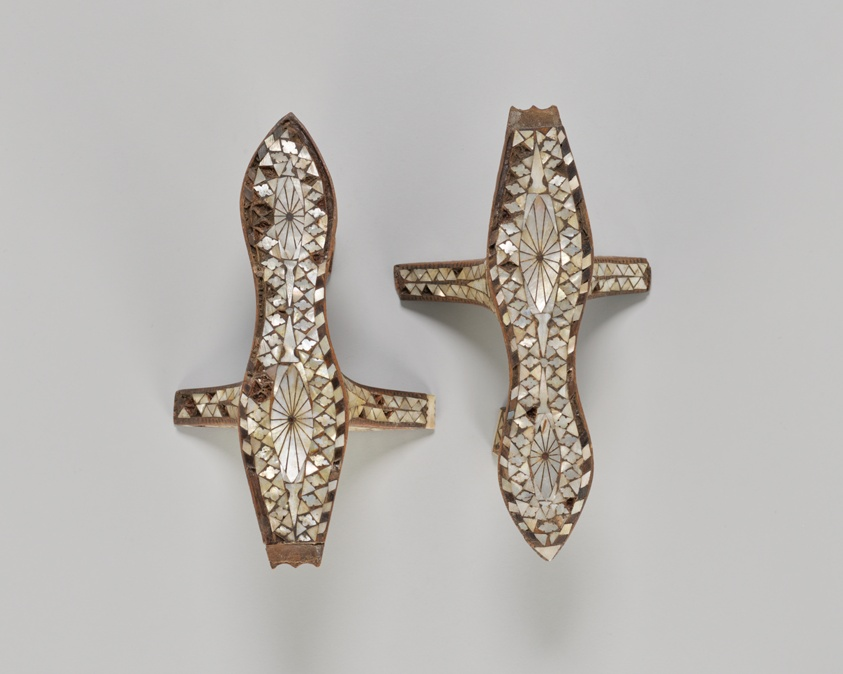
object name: Textile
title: Pair of Clogs (Qabqab)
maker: Algeria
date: Mid–19th century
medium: Wood inlaid with mother of pearl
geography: Algeria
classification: textile; costume accessory - shoe; shoes - misc; costume; dress (garment); clothing